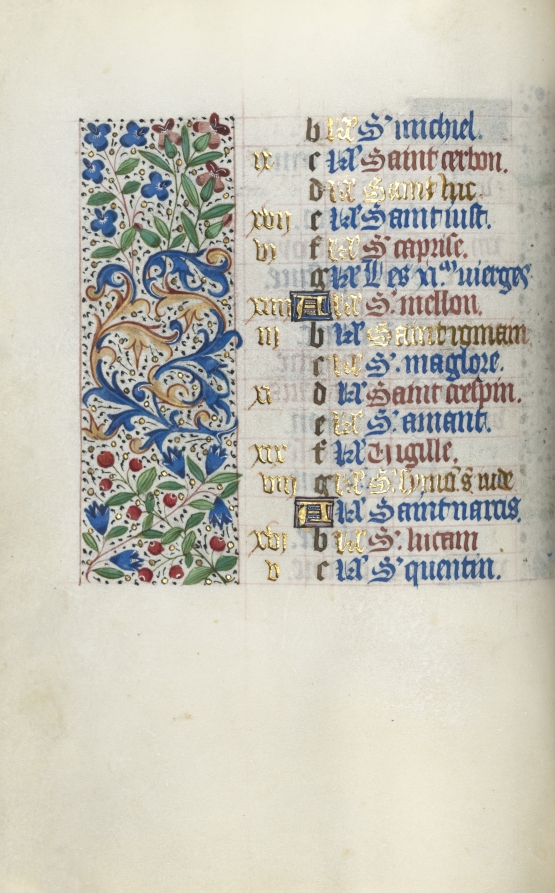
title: Book of Hours (Use of Rouen): fol. 10v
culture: France, Rouen, 15th century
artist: Master of the Geneva Latini (French, active Rouen, 1460–80)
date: c. 1470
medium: ink, tempera, and gold on vellum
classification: Bound Volume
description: In the late 1400s and early 1500s Rouen was an established and important center of book production. The city’s cathedral had a wealthy chapter that spent large sums of money to commission books and to maintain its extensive library. The stationers and booksellers would have likely been concentrated in or near the cathedral precinct. This artist, named after a manuscript now in Geneva, was Rouen’s principal illuminator during the second half of the 1400s.